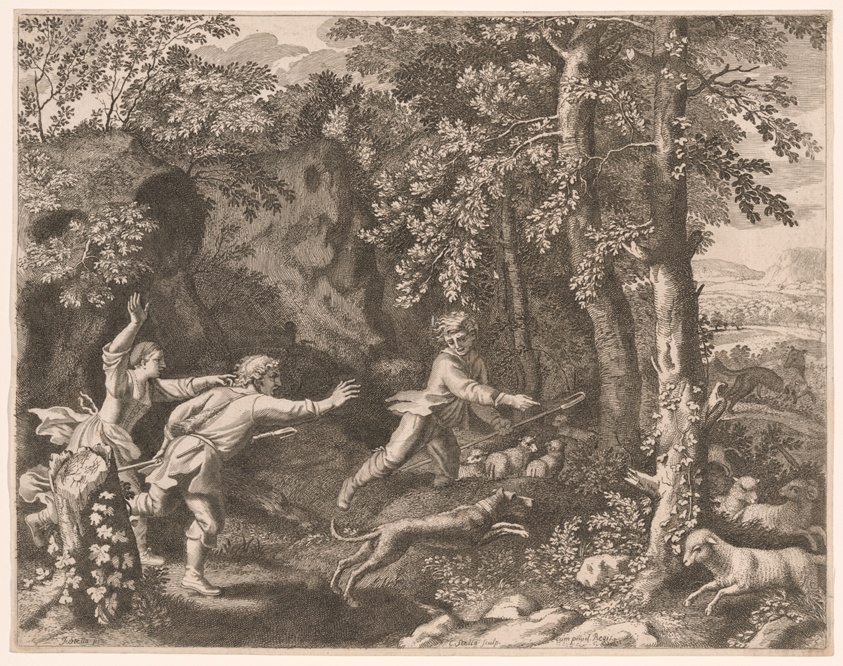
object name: Print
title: The Wolf Hunt, Plate 5 from Pastorales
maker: Claudine Bouzonnet-Stella (French, 1636–1697); after Jacques Stella (French, 1596-1657)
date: 1667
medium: Etching in black on cream laid paper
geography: France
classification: prints and drawing; paper; etching; print